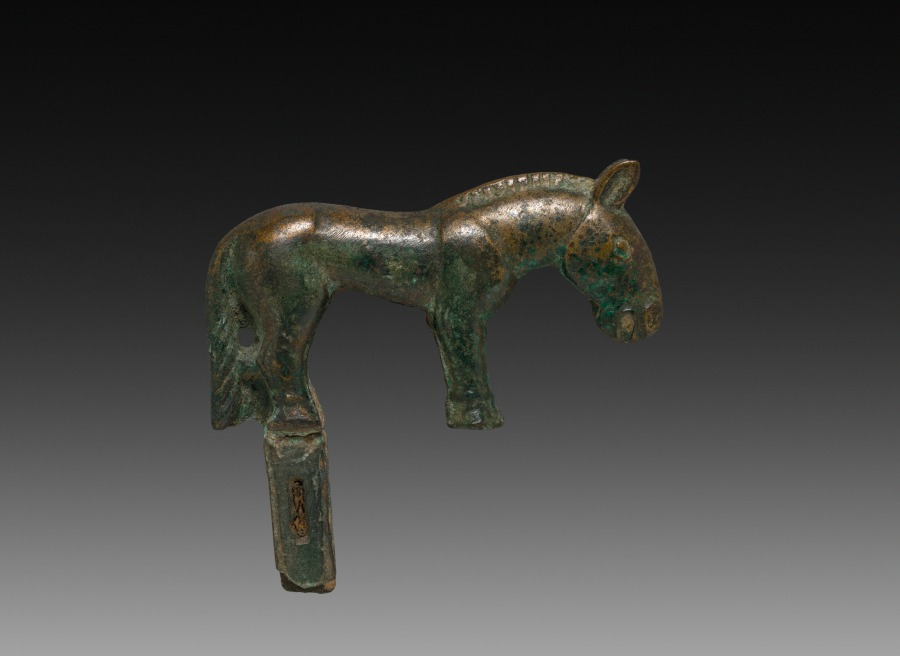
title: Wild Horse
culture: China, Ordos Region, Han dynasty (202 BCE–220 CE)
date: c. 100 BCE–100 CE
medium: cast bronze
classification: Sculpture